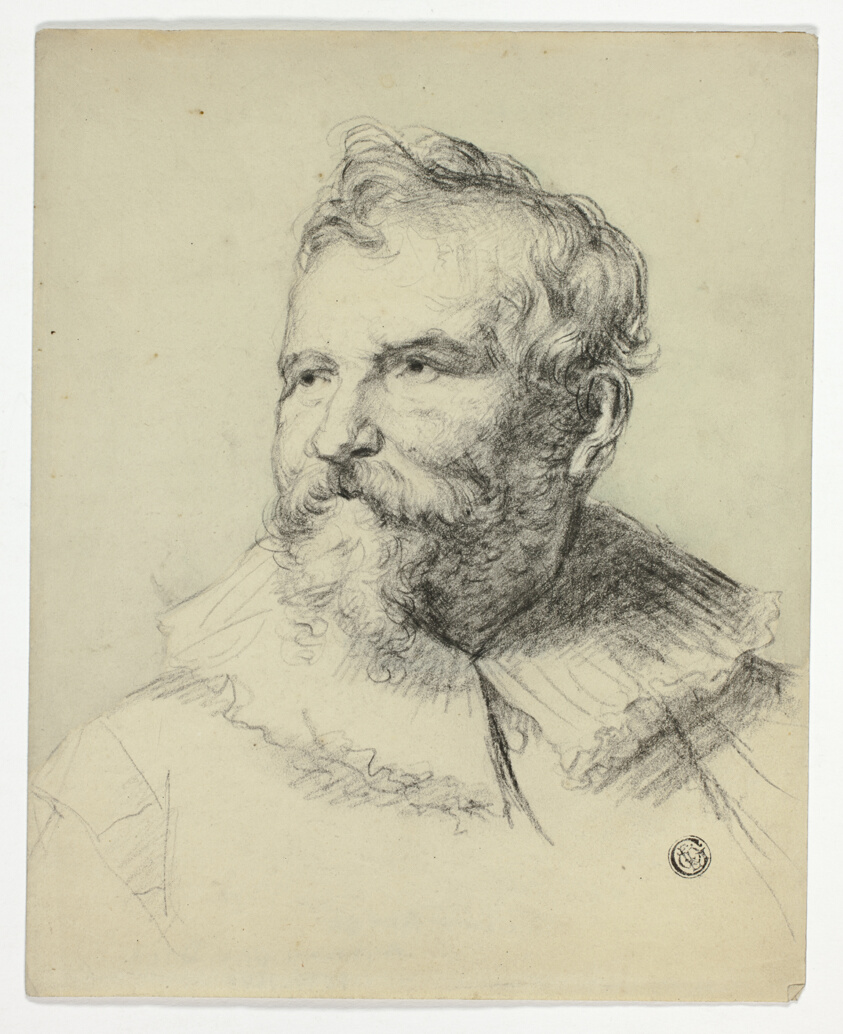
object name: Drawing and Watercolor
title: Adam van Noort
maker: After Anthony van Dyck; Flemish, 1599-1641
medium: Charcoal, with brush and gray wash, and traces of graphite, on cream wove paper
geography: Flanders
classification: chalk; drawings (visual works); prints and drawing